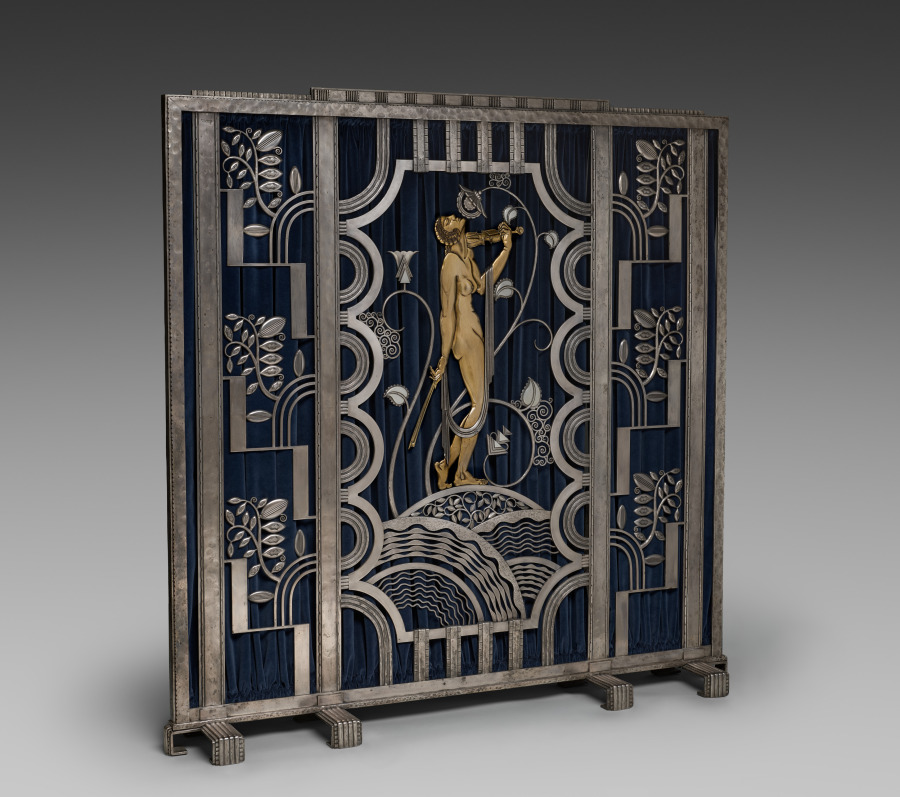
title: Muse with Violin Screen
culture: America, Ohio, Cleveland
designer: Paul Fehér (American, born Hungary, 1898–1990)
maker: Rose Iron Works (America, Ohio, Cleveland, est. 1904)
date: 1930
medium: Steel, brass; silver and gold plating, cotton velveteen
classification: Metalwork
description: Since the early years of the 20th century, the Rose Iron Works, a Cleveland supplier of architectural ornament, has produced distinguished metalwork. The company’s founder, Martin Rose, was born in Austria-Hungary and studied ornamental metalsmithing in Vienna prior to immigrating to Cleveland in 1902. In the 1920s, he hired a talented young Parisian designer, Paul Fehér, to work for the firm. Fehér’s designs, culminating in this massive screen, brought a modern European sensibility to the Rose Iron Works production. With its geometric patterning, highly stylized and abstracted natural forms, and the central figure reminiscent of the celebrated jazz singer Josephine Baker, this screen reflects the classic motifs of Art Deco design.